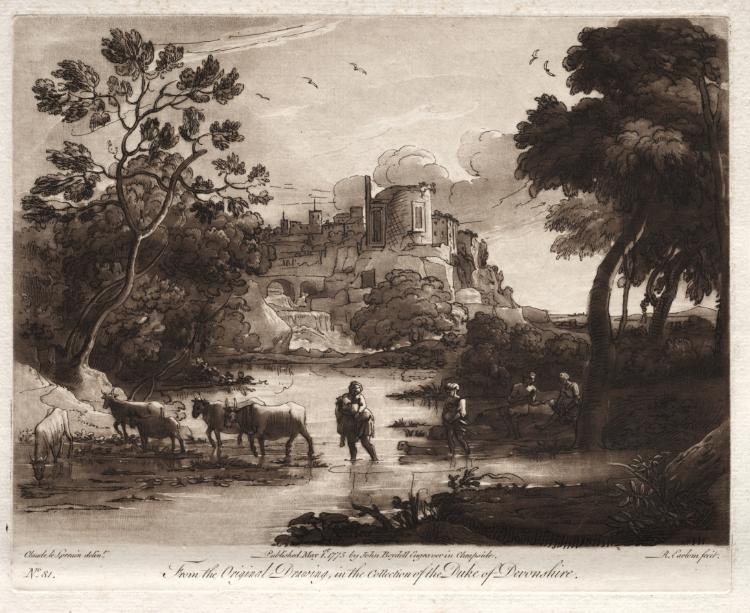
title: Liber Veritatis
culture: England, 18th century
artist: Richard Earlom (British, 1743–1822)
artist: after Claude Lorrain (French, 1604–1682)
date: 1777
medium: etching and mezzotint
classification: Print